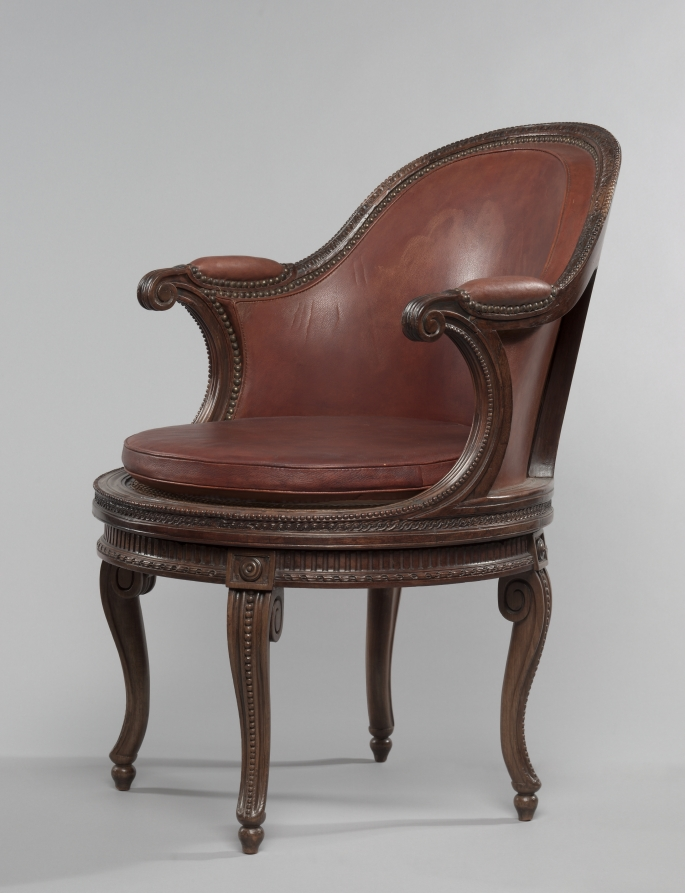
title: Desk Chair with Swivel Mechanism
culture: France, Paris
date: c. 1780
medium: walnut with caning and leather upholstery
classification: Furniture and woodwork